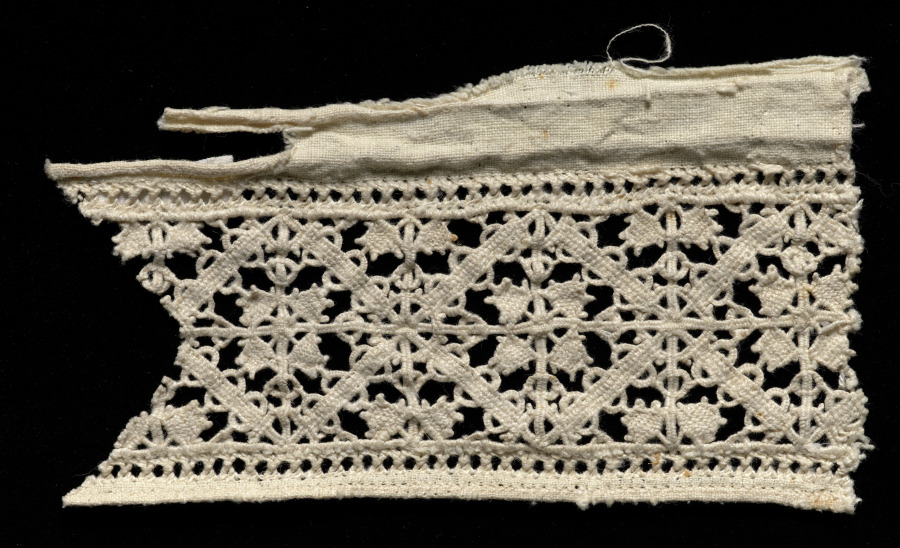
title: Lace Fragment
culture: Italy, Venice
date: 1500s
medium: Linen: needle lace, reticella insertion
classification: Lace